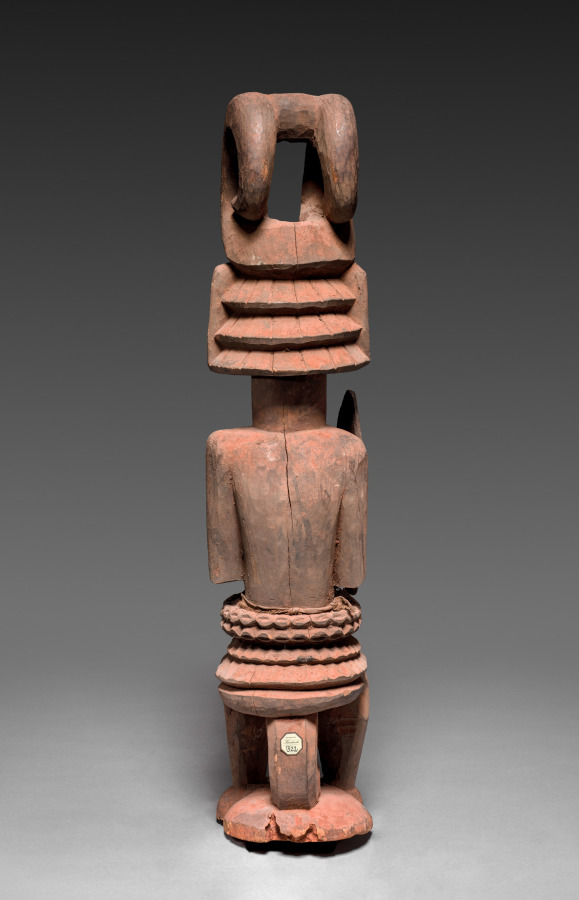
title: Shrine Figure (Ikenga)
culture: Africa, West Africa, Nigeria, Igbo carver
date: possibly early 1900s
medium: Wood, organic materials, and raffia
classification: Sculpture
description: This seated figure of a man holding a cutlass and an inverted human skull is a cult object called ikenga, associated with achievement and success. Standing at the center of a man’s personal shrine, the sculpture receives prayers and sacrifices in return for the ancestors’ guidance. An elaborate headdress comprising two horn-like extensions reinforces the cult’s preoccupation with masculinity, while facial incisions known as ichi refer to membership in one of many male associations.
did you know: This figure associated with achievement and success would have received prayers and sacrifices in return for the guidance of ancestors.